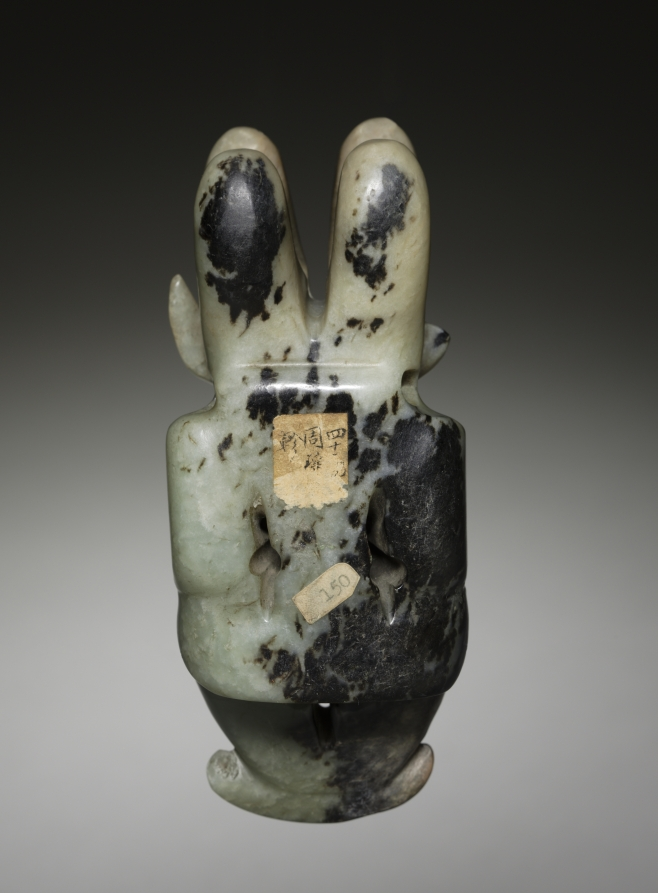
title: Amulet in the Form of a Seated Figure with Bovine Head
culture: Northeast China, Neolithic period, probably Hongshan culture (4700–2920 BCE)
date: c. 4700–2920 BCE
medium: jade (nephrite)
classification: Jade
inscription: There are two paper labels on the back of the jade pendant: one partial label with Chinese characters and one with the typed number "150".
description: With a bovine head and four horns, this seated figurine was a powerful ritual and shamanic symbol. Drill holes above its shoulders form two interconnected perforations for suspension, suggesting that the jade was originally used as a pendant, presumably by the shaman performing the tasks of journeying to and communicating with the supernatural realms.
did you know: CMA daringly acquired this masterpiece without knowing exactly what it was. Only after Chinese archaeologists started excavating similar jades in Northeast China could it be attributed to the Hongshan culture.